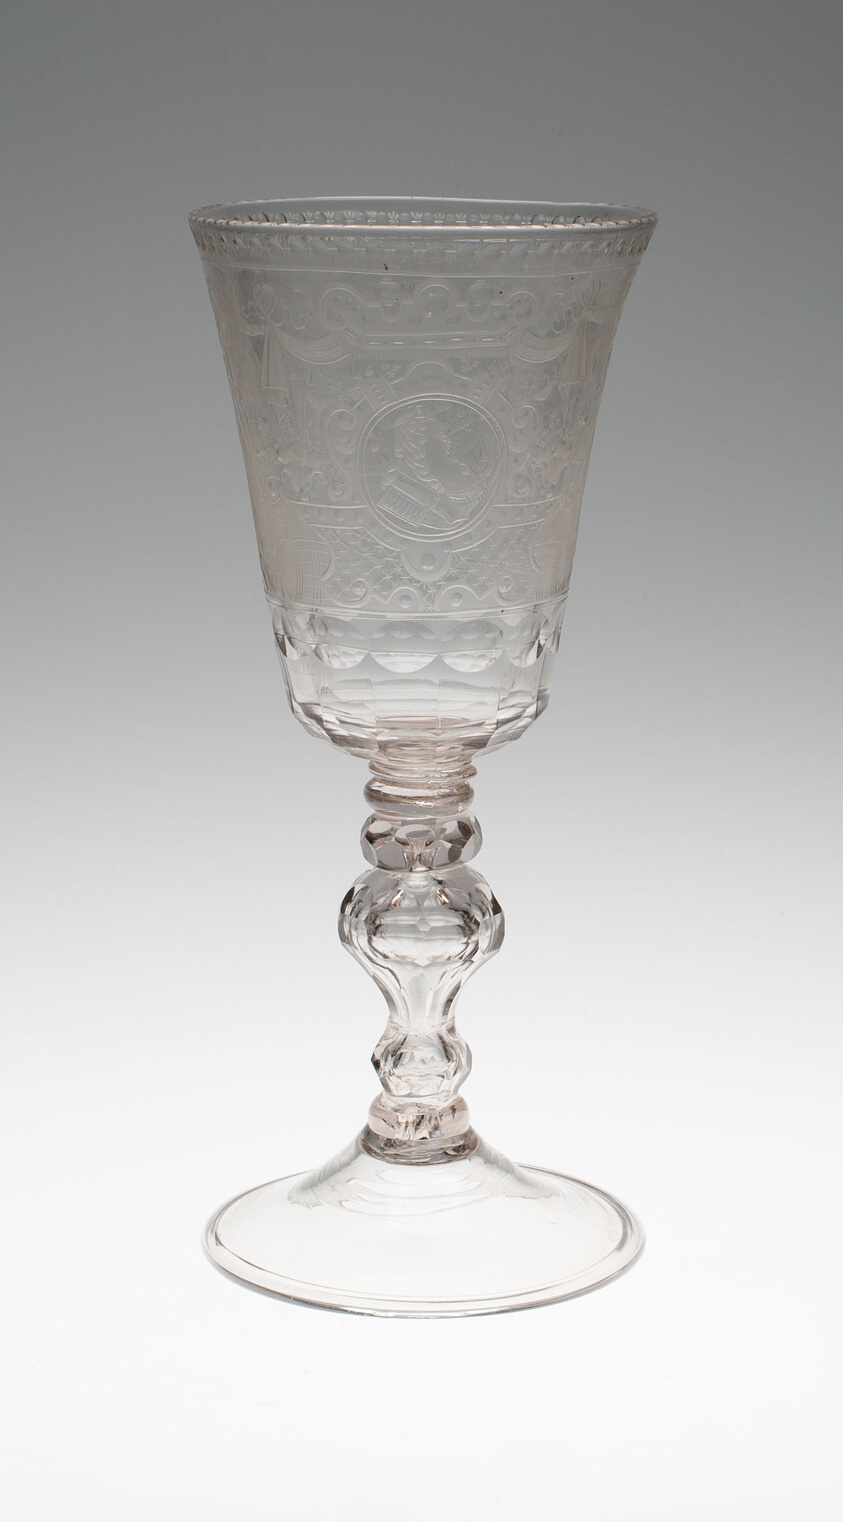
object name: Glass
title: Goblet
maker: Russia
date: c. 1760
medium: Glass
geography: Russia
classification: drinking vessel; glass; european decorative arts